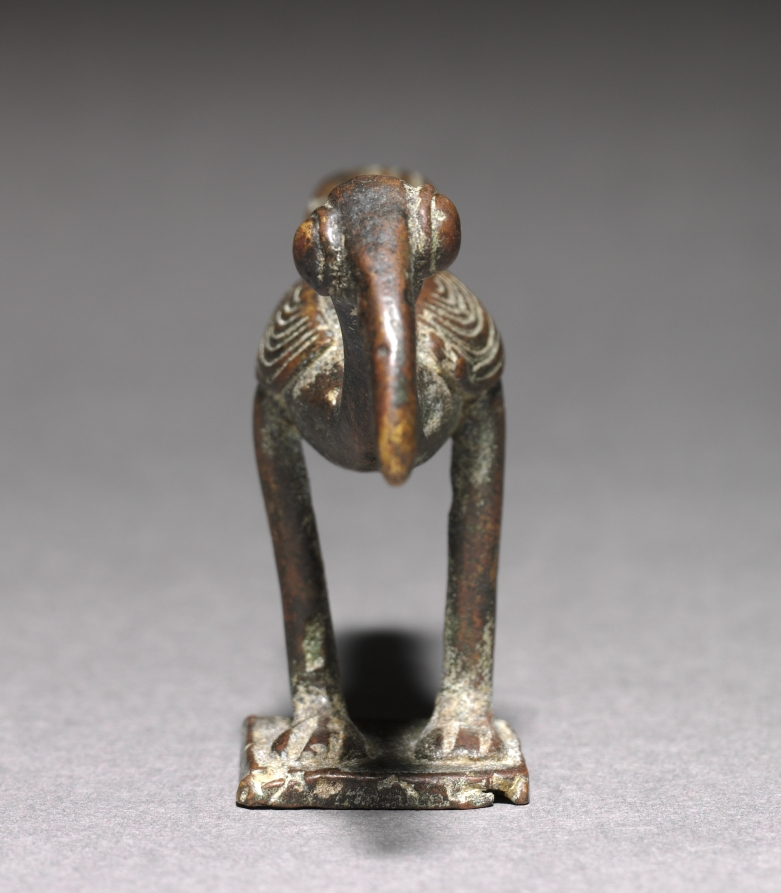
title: Hornbill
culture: Africa, West Africa, Côte d'Ivoire, Senufo style, unknown maker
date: 1900s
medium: Copper alloy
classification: Sculpture